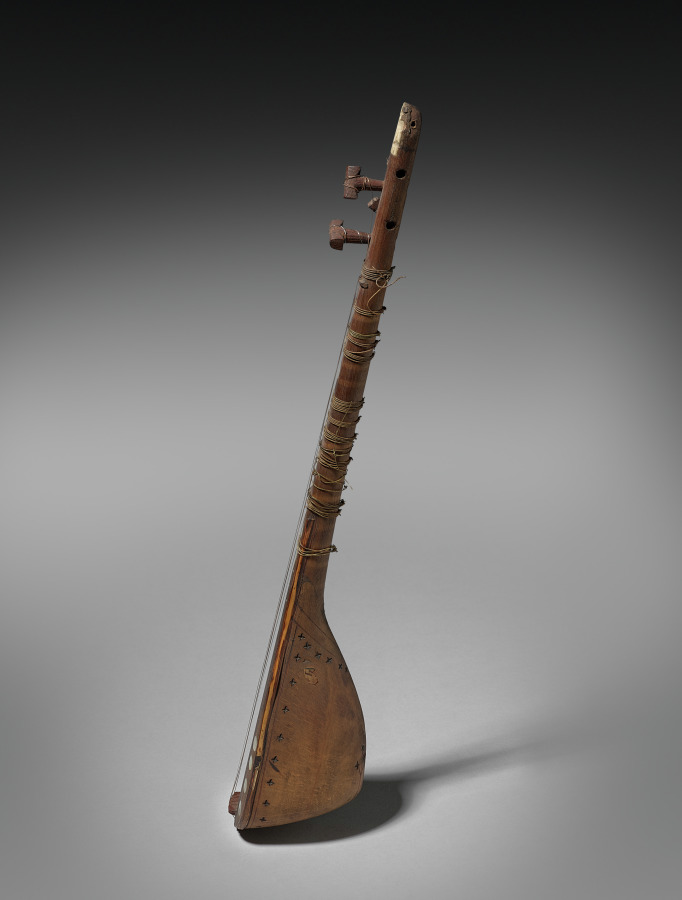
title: Tanbūr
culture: Syria or Turkey, Ottoman period (1299–1922)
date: late 1800s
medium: Wood, bone, mother-of-pearl, and wire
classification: Musical Instrument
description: This long-necked lute collected in Ottoman Syria possesses traits that are Syrian, Turkish, and Iranian and provides an example of the musical interaction between cultures. It is an ancient instrument and resembles lutes used in Pharaonic Egypt and Mesopotamia. In its many forms, the tanbūr was a common instrument throughout the Islamic world. It is often used as a solo instrument in both sacred and secular contexts. Burn marks decorate the pear-shaped body along with inlaid dots of mother-of-pearl, which may also have helped with navigation of the fret board by the player.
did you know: The two pairs of wire strings would be played with a quill plectrum.